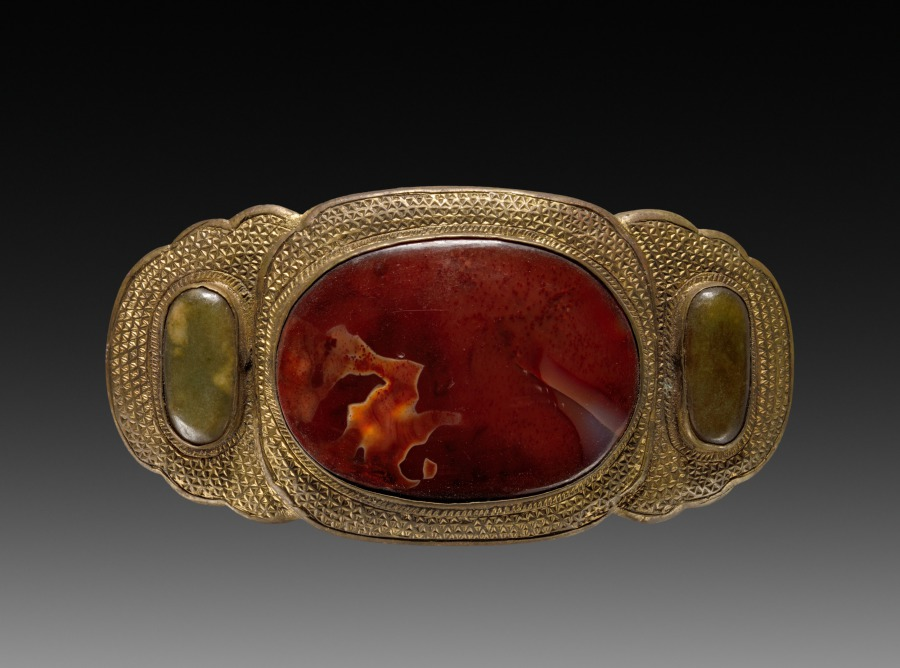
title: Buckle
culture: China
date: 1900s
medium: brass set with agate and jade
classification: Jewelry